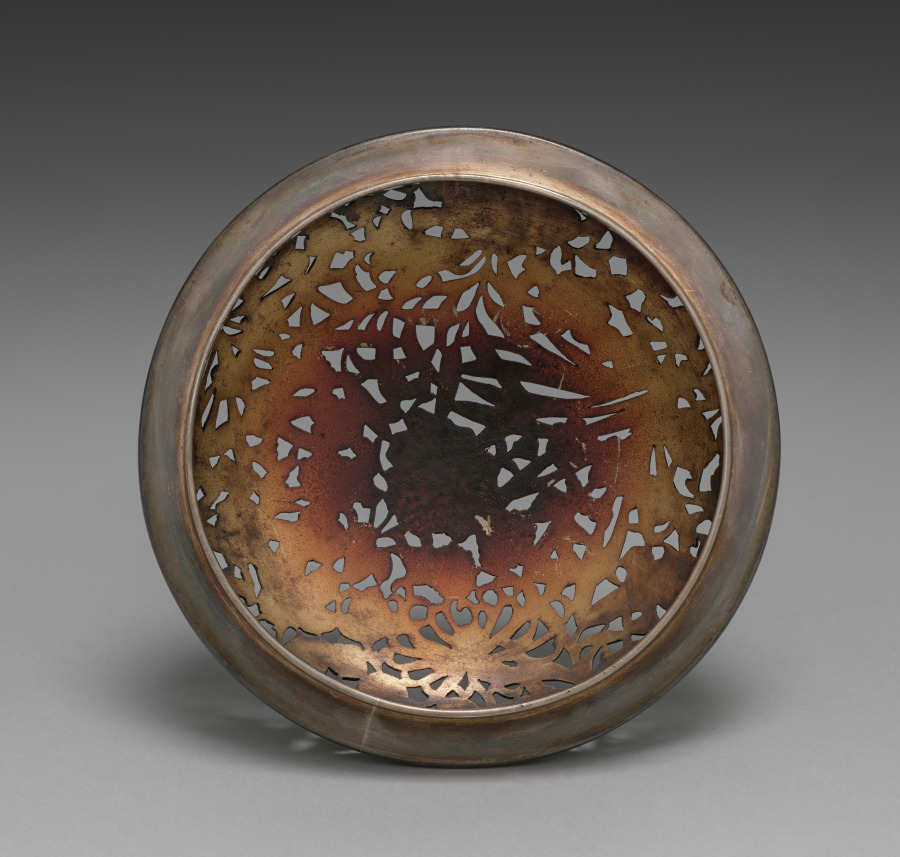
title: Lid for an Incense Burner with Peony and Cloud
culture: Japan, Meiji period (1868–1912)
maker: Seifū Yohei III (Japanese, 1851–1914)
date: 1914–46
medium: Floral openwork silver lid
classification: Ceramic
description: Yohei IV’s incense burner has a scrolling floral pattern of peonies and nyoi staff-head forms around the body and a band of clouds around the collar. These are done in low relief, with incised lines marking the details in the flower petals and leaves. The silver lid has a proliferation of flowers, including lily, peony, and a variety of chrysanthemums. The box lid identifies the subtle pink over an ivory body as “dawn’s light[–glazed] porcelain” (shokōji). After he became an Artist of the Imperial Household, Yohei III created a number of glaze and clay combinations with what would have been considered Japan-focused names to be in alignment with his position as an artist representing the nation. Among them was a glaze called “dawn’s light pale [pink] color” (akebonoiro tansai), which he invented in 1895. It is possible that this incense burner is an example with this glaze, despite the slightly different name given on the box. While the name alludes to the Land of the Rising Sun, an epithet for Japan, the burner’s motifs remain very much drawn from the Chinese repertoire.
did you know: Seifū Yohei IV’s incense burner has a pale pink glaze named “dawn’s light.”